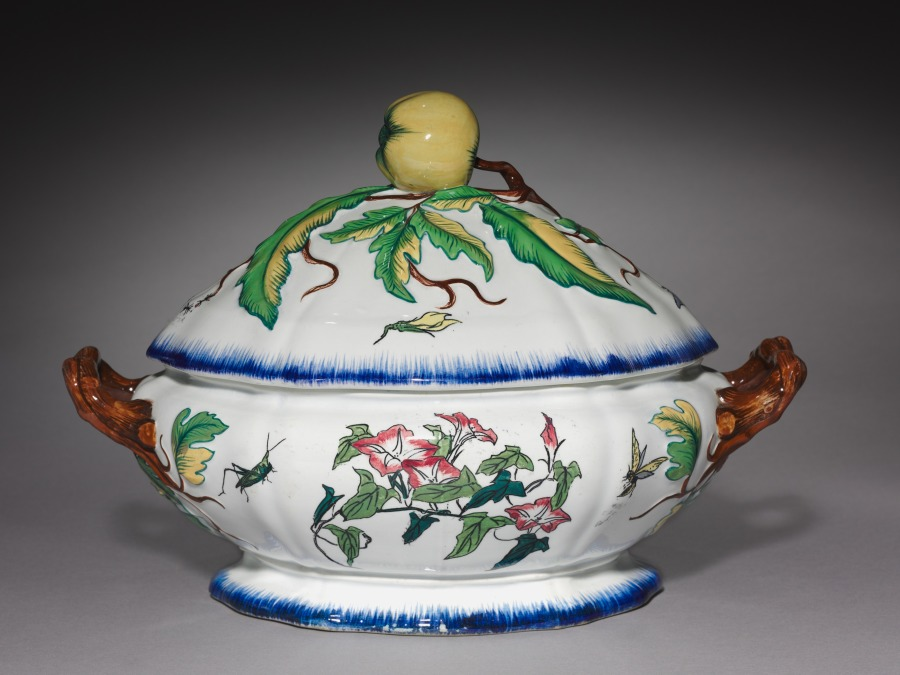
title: Covered Tureen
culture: France, Creil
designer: Félix Bracquemond (French, 1833–1914)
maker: Creil Factory (French)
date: 1866–75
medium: porcelain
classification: Ceramic